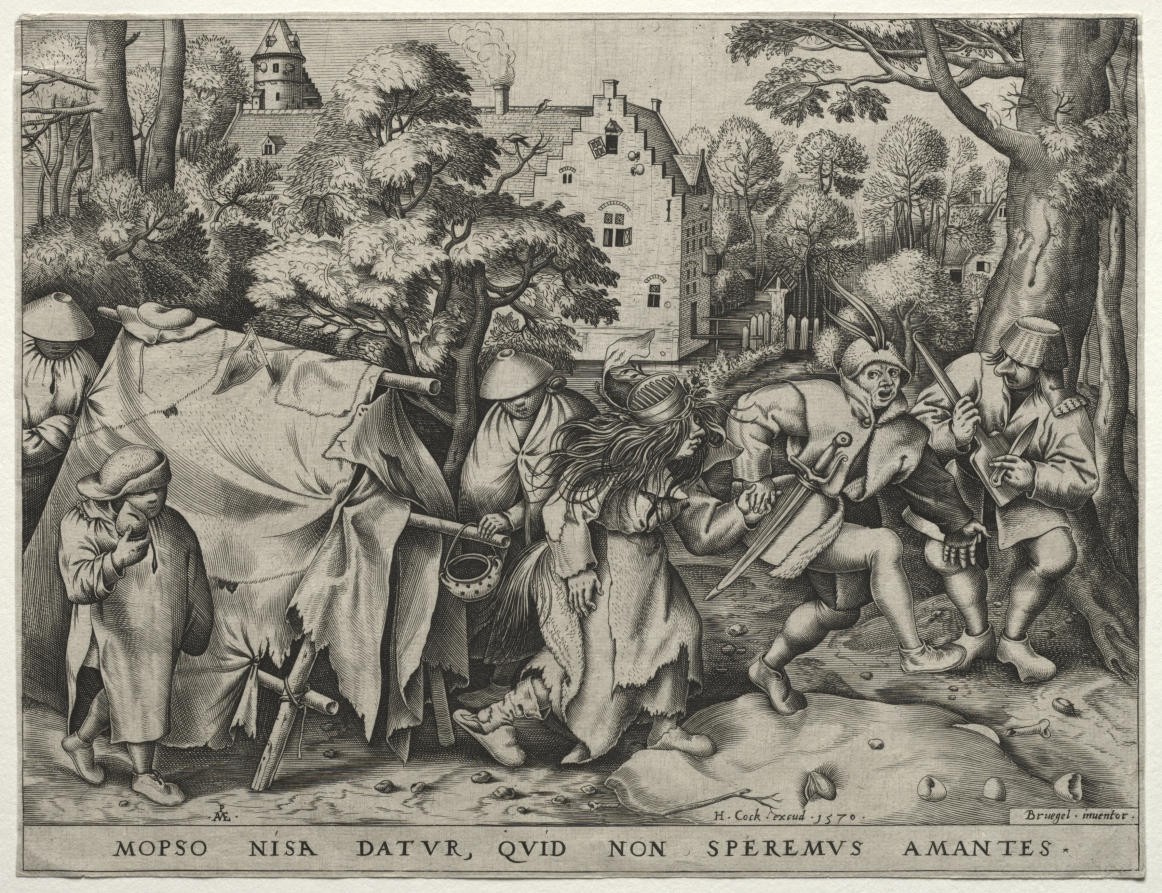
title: The Wedding of Mopsus and Nisa (The Dirty Bride)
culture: Flanders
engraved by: Pieter van der Heyden (Netherlandish, c. 1530–after 1572)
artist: after Pieter Bruegel (Netherlandish, c. 1525/30–1569)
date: 1570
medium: engraving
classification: Print